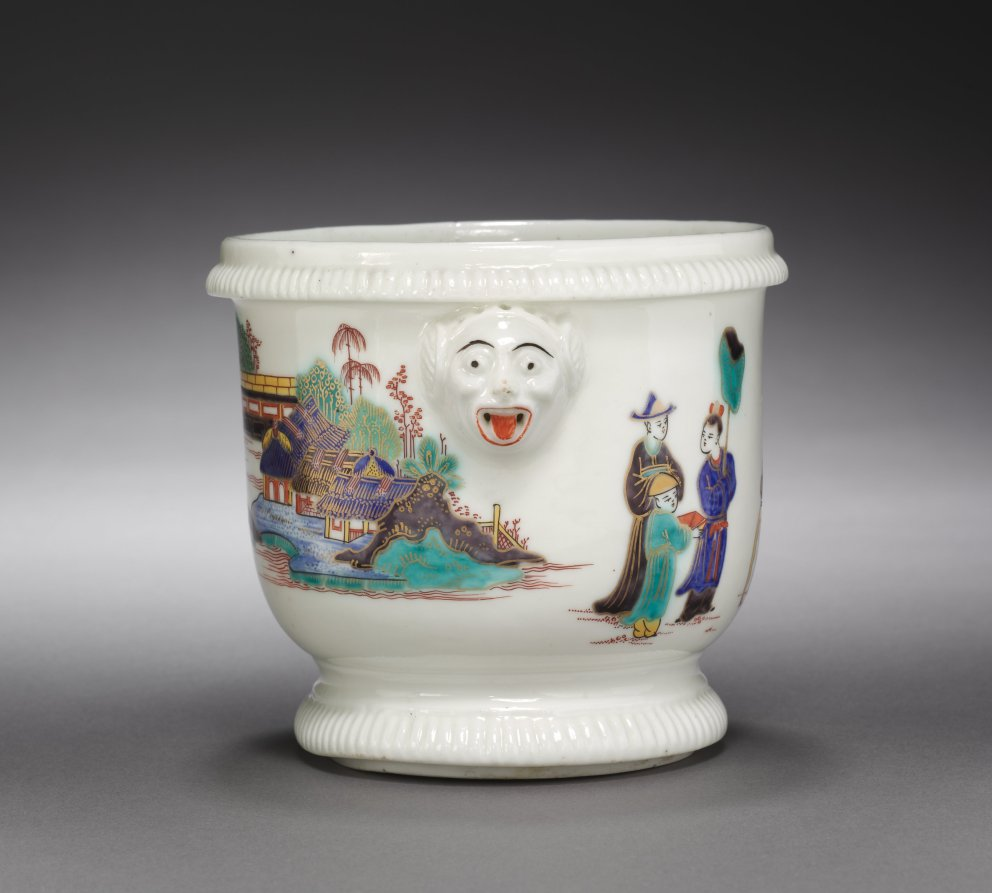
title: Bottle Cooler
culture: France, Saint Cloud, 18th century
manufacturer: Saint Cloud Porcelain Factory (French)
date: c. 1725– 1735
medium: soft-paste porcelain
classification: Ceramic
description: The form of these cachepots is entirely typical of Saint-Cloud porcelain of about 1725. Their decoration, based upon Chinese porcelains of the so-called "famille-verte" type, is most unusual. Polychromed enamels were not often employed on Saint-Cloud porcelains, and figural scenes are very rare.